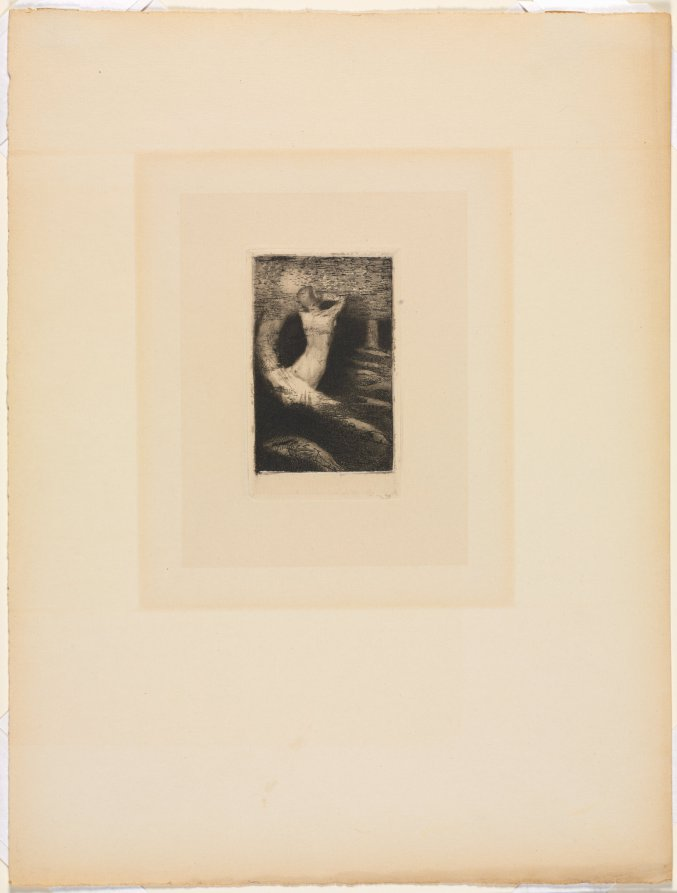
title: Passage of a Soul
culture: France, 19th century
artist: Odilon Redon (French, 1840–1916)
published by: Editions Lucien Vogel, Paris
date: 1891 (printed 1920)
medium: etching and drypoint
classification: Print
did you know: Odilon Redon created this work by cutting the plate from an existing print in two. He reworked the right side of the plate into the image seen here.